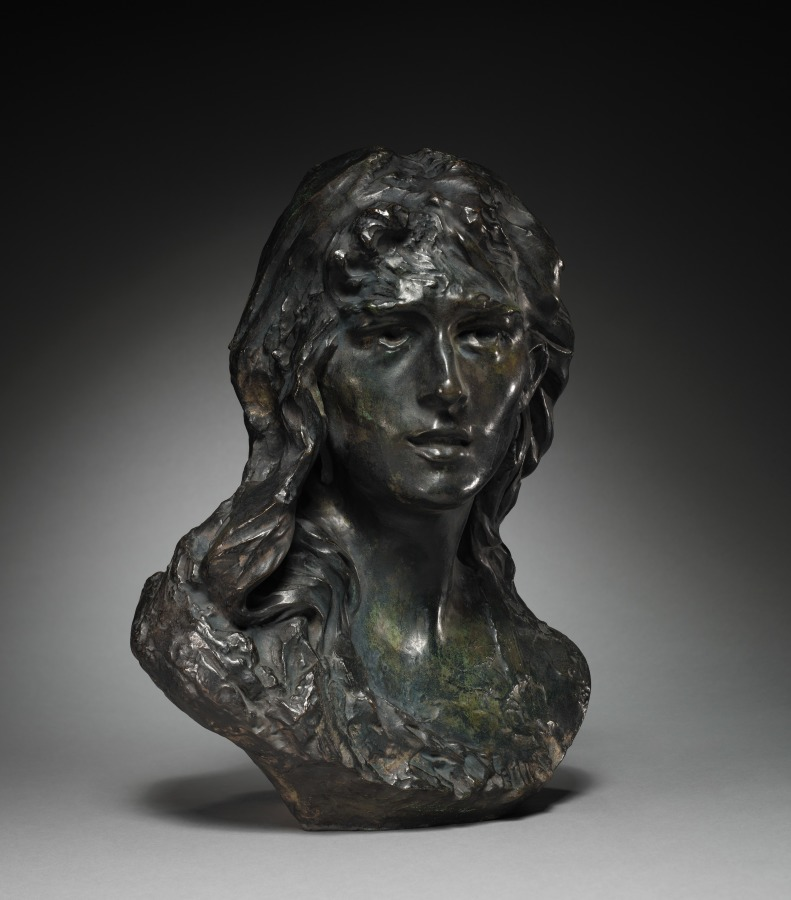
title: Mignon: Bust of Rose Beuret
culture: France, late 19th-early 20th century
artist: Auguste Rodin (French, 1840–1917)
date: c. 1867–1868 (original model)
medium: bronze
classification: Sculpture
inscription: Signed on shoulder to right: "A. Rodin"